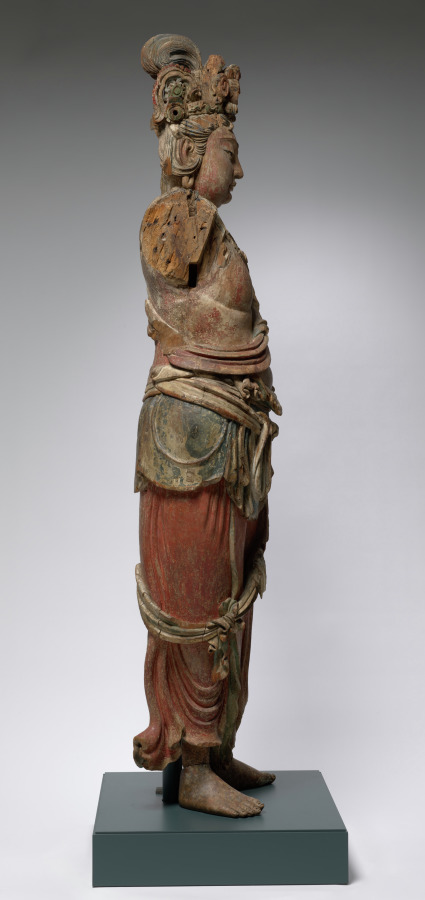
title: Eleven-Headed Guanyin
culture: China, late Northern Song dynasty (960-1127) - Jin dynasty (1115-1234)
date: 1100–1200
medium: wood with polychromy and cut gold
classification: Sculpture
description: The bodhisattva is an enlightened being dedicated to the spiritual awakening of all beings. The compassionate bodhisattva Guanyin, in a variety of manifestations, is probably the most popular deity of worship in Chinese Buddhism. In the Esoteric Buddhist form shown here, this standing Guanyin has a total of eleven heads, with smaller ones above the principal head. The uppermost head represents the Buddha Amitabha, to whom he is closely related. The eleven heads symbolize the Buddha’s steps on the path to enlightenment.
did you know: This Guanyin is carved from a single block of willow (genus Salix sp.).